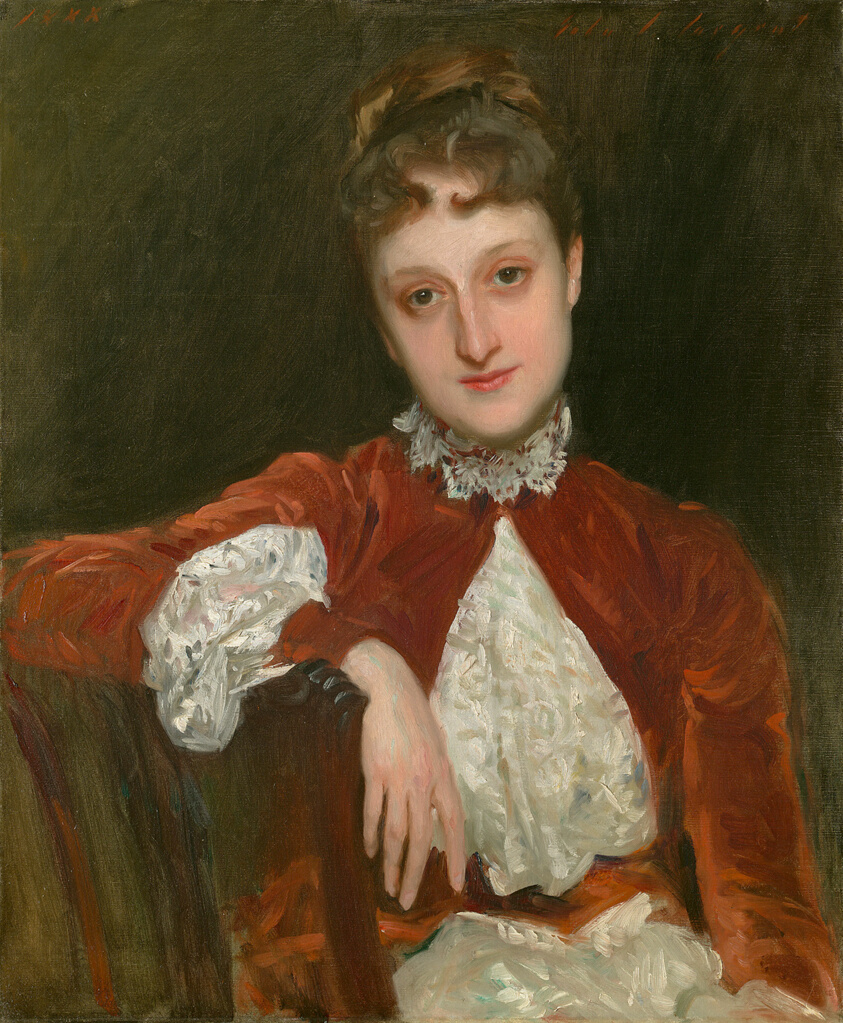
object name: Painting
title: Mrs. Charles Deering (Marion Denison Whipple)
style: Impressionism, Realism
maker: John Singer Sargent (American, 1856–1925)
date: 1888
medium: Oil on canvas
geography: United States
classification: painting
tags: Chicago, people, portraits